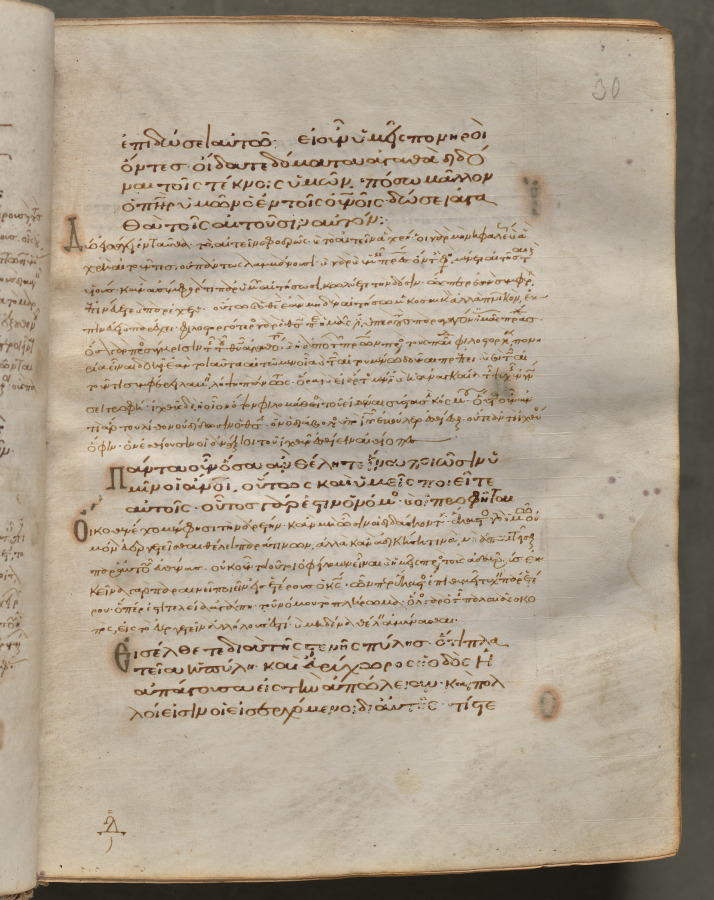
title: Text, folio 30 (recto), from a Gospel Book with Commentaries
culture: Byzantium, Constantinople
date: c. 1000–1100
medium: ink, tempera, and gold on vellum; leather binding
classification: Bound Volume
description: Each of the four gospels in this book opens on a page with brilliantly illuminated borders depicting the author of the text as well as birds—principally peacocks, symbols of the immortality of the soul—and fountains, representing the fountain of life and the salvation of the soul. This volume consists of 428 leaves with texts in Greek. Its level of sophistication suggests that it was probably written and decorated in a monastery in Constantinople.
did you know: Gospel books were carried in procession through Byzantine churches.